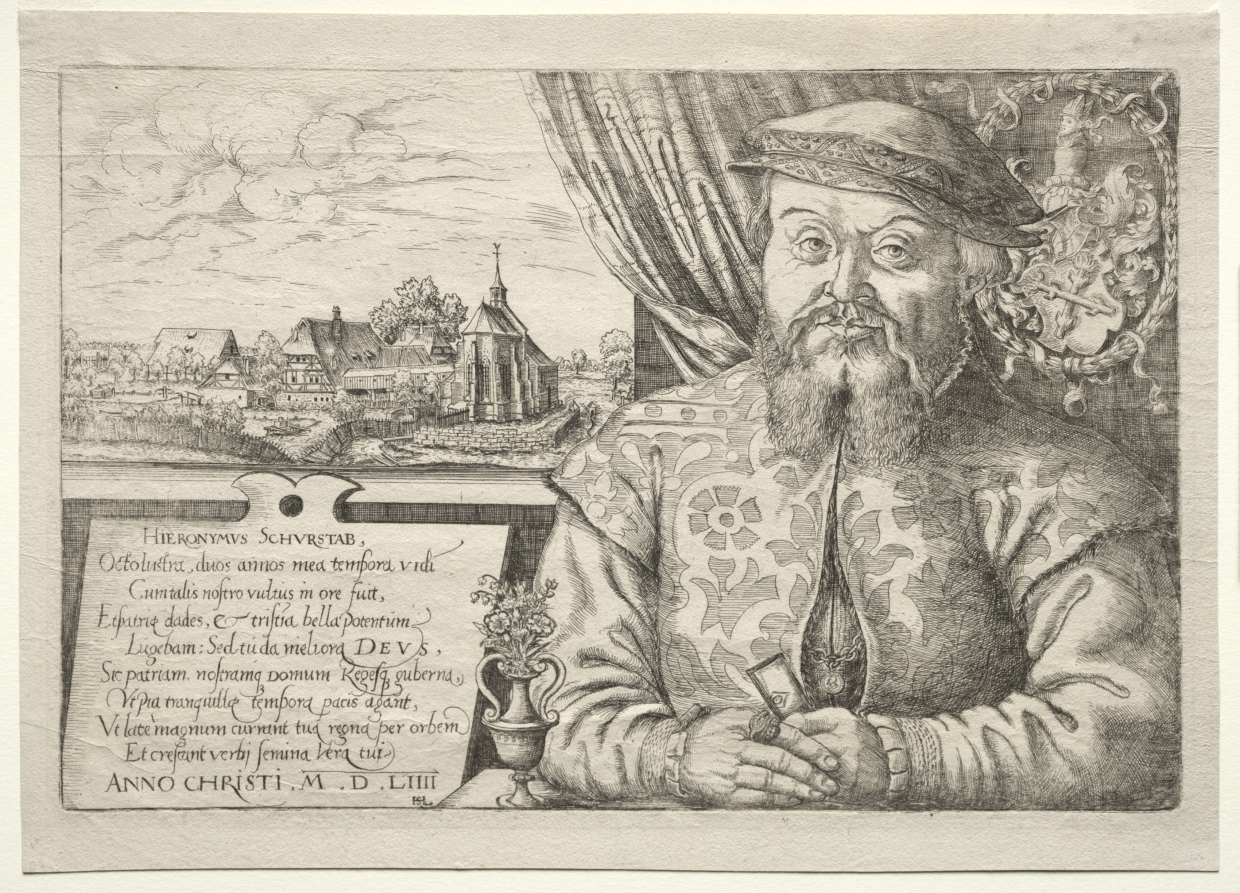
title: Hieronymus Schurstab, Mayor of Nuremberg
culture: Germany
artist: Hanns Lautensack (German, 1524–1566)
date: 1554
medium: etching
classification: Print